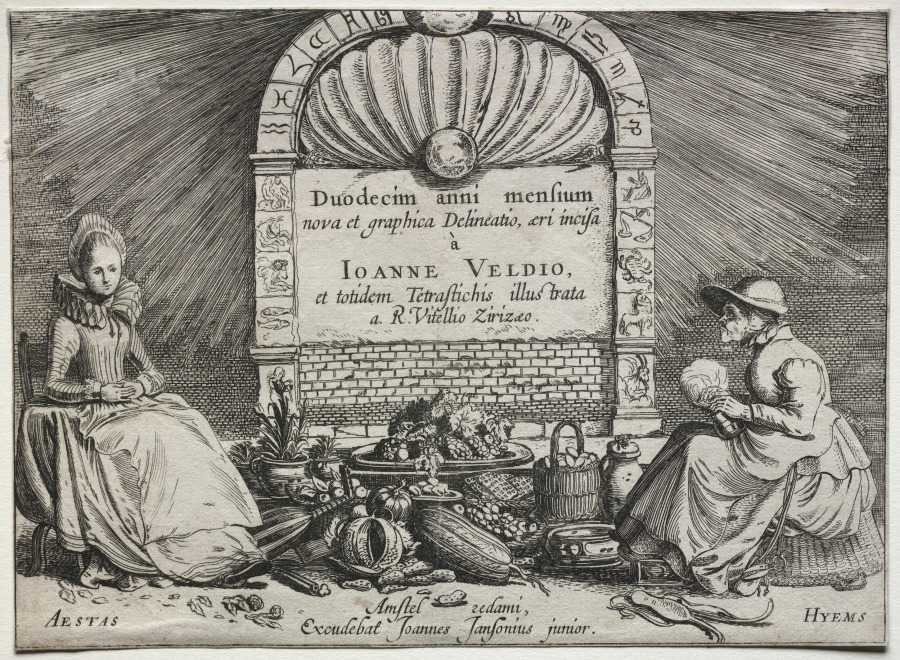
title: The Twelve Months: Title Page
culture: Netherlands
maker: Jan van de Velde II (Dutch, 1593–1641)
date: 1608–18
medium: etching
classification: Print